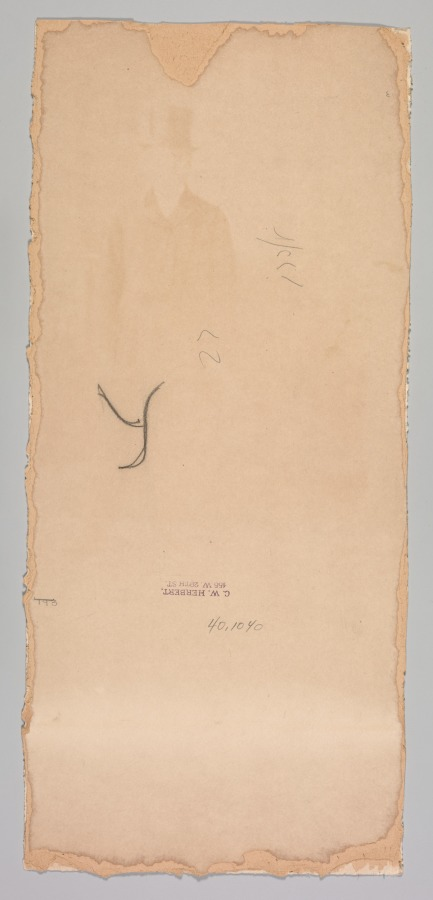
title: Contemporary Beauties Third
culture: Japan, Edo period (1615–1868)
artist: Kitagawa Utamaro (Japanese, c. 1754–1806)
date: 1753–1806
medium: color woodblock print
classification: Print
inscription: Signature: Utamaro fude Publisher Seal: Murataya Jihe